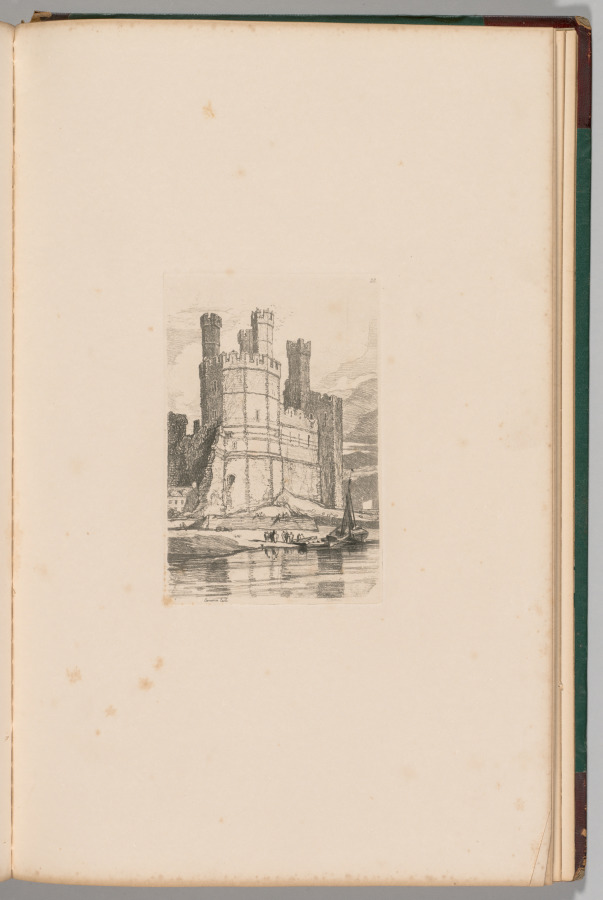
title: Liber Studiorum: Plate 28, Caernarvon Castle, N. Wales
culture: England, 19th century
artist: John Sell Cotman (British, 1782–1842)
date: 1838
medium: softground etching, from a bound volume containing 48 plates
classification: Bound Volume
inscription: In plate, within image, upper right: 28; in plate, below image: Caernarvon Castle J S Cotman